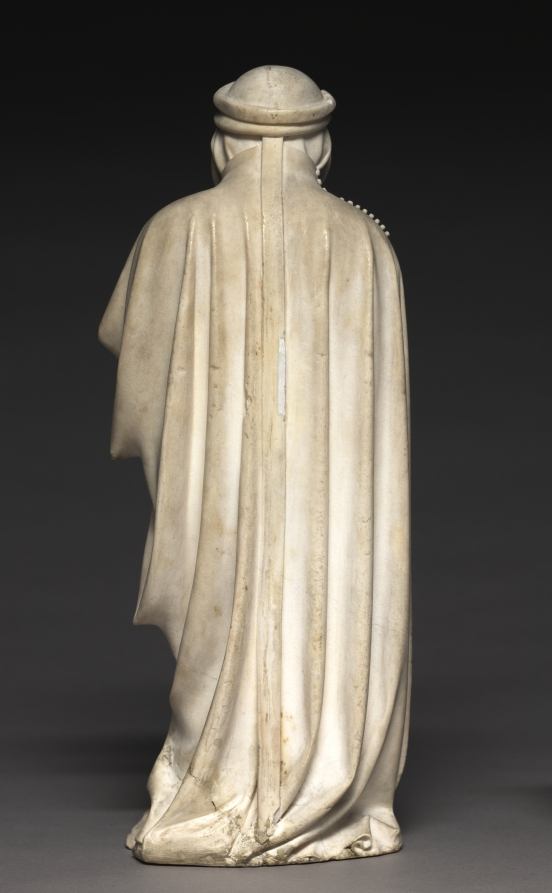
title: Mourner from the Tomb of Philip the Bold, Duke of Burgundy (1364–1404)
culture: Netherlands, active Dijon, 15th century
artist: Claus de Werve (Netherlandish, 1380–1439)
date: 1404–1410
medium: vizille alabaster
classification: Sculpture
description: This figure comes from the tomb of Duke Philip the Bold from the church of Champmol near Dijon (Burgundy, France). Philip, who founded the monastery and designated it as his burial place, hired the best artists, many of whom came from the Netherlands. While the commission was given in 1381, the work was not completed until 1410, six years after the duke’s death. This mourner is unusual for the time because it is not carved as a static low relief on the pedestal of the tomb but interacts with the viewers and their fellow procession members. The lifelike quality of the figure is due in large part to the alabaster. Its softness allowed artists to carve details into the material, and the transparent, milky white stone could also be polished to a high gloss.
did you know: During his life, Duke Philip founded the monastery of Chartreuse de Champmol to serve as a final resting place for himself and his family.